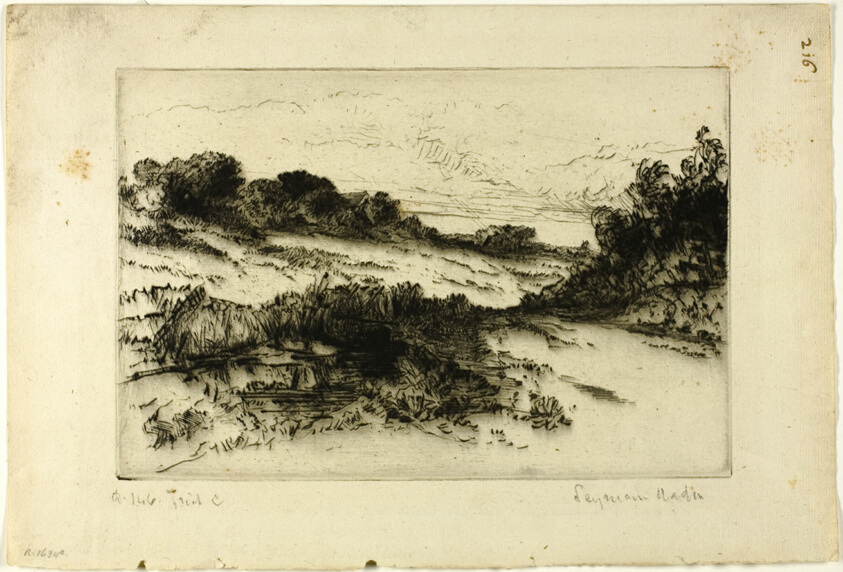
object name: Print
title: Windmill Hill, No. I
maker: Francis Seymour Haden (English, 1818-1910)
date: 1877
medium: Drypoint on copper printed on cream laid paper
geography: England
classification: etching; print; prints and drawing